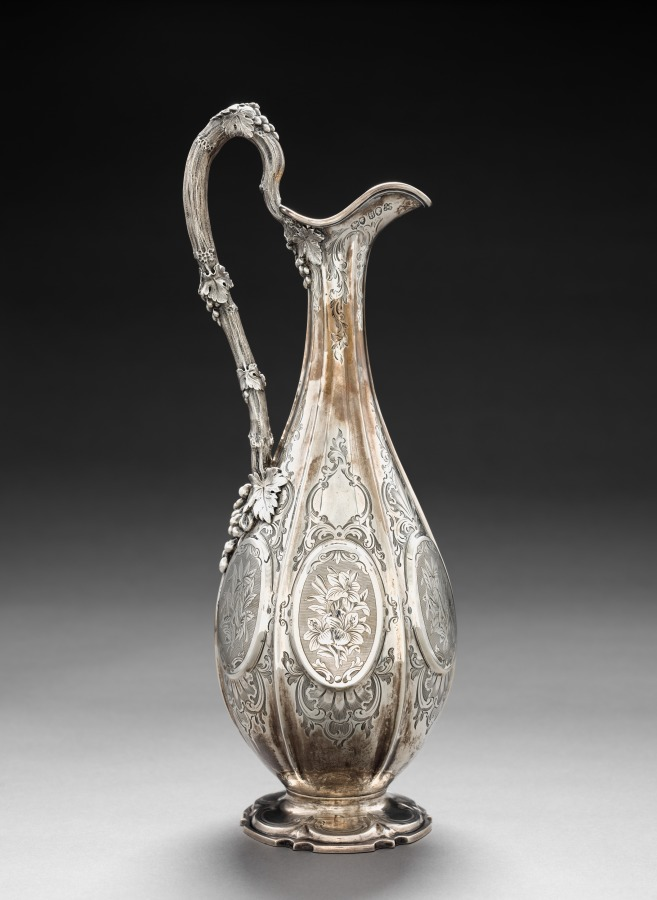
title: Pitcher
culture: England, 19th century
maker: Edward Barnard & Sons (British, c. 1680–2003)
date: c. 1870–80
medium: silver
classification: Silver